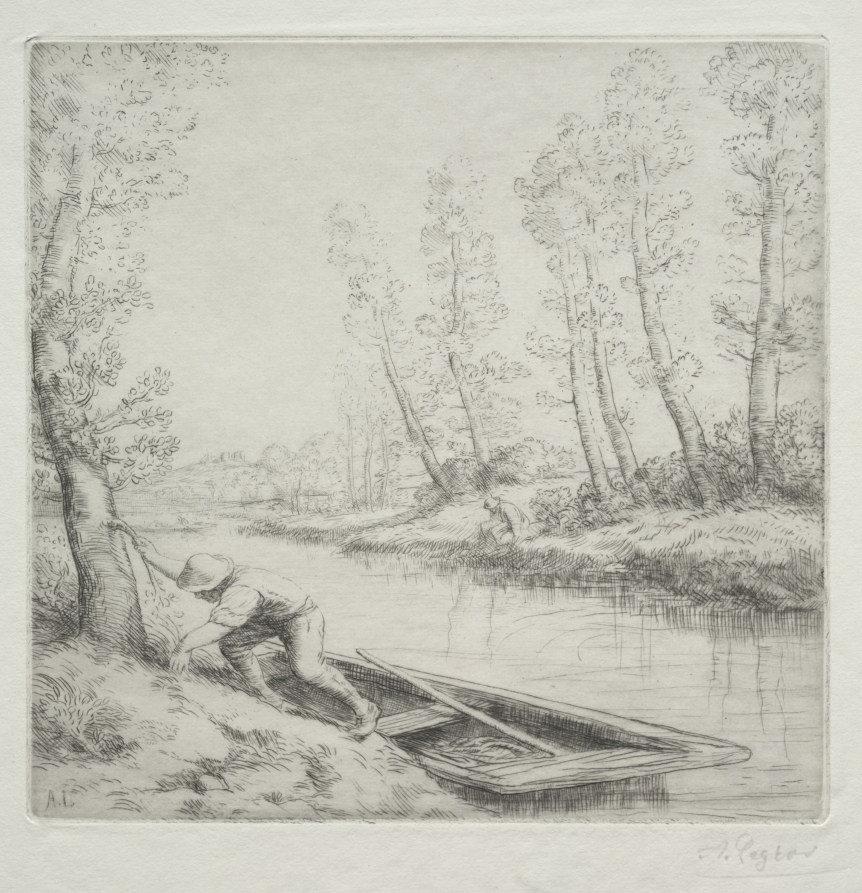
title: Morning on the River (Le Matin sur la rivière)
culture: France, 19th-20th century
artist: Alphonse Legros (French, 1837–1911)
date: c. 1857–1911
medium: etching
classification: Print